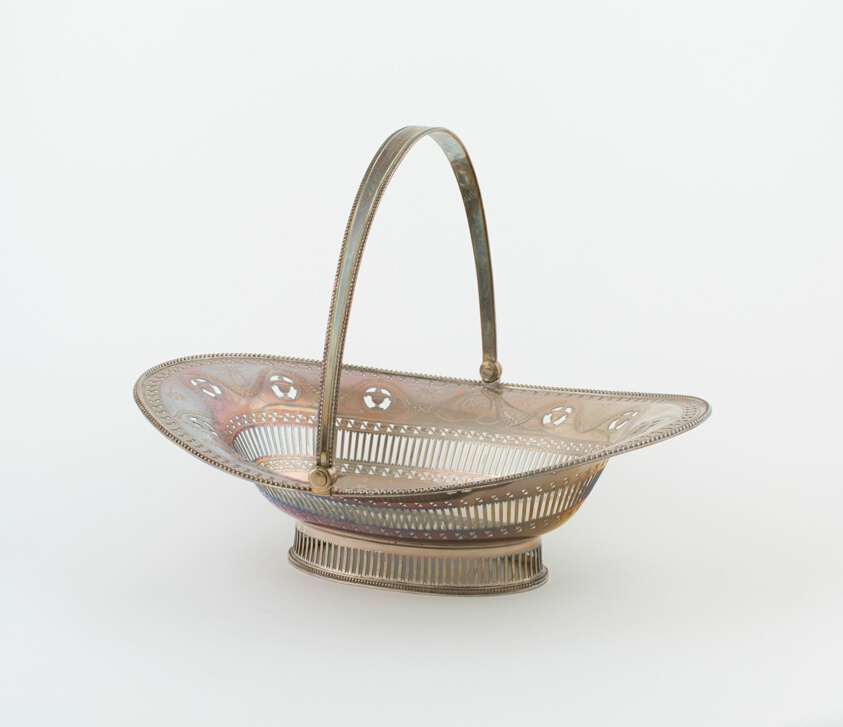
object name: Metalwork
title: Cake Basket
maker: Hester Bateman; English, 1709-1794; London, England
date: 1784/85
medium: Silver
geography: London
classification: tableware; silver; metalwork; european decorative arts